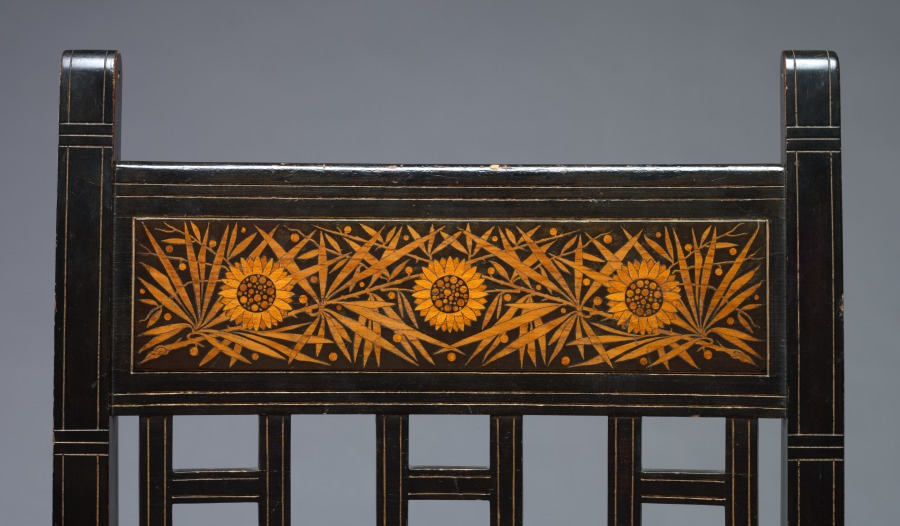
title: Chair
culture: America, New York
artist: Herter Brothers (American)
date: c. 1880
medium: ebonized cherry and other woods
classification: Furniture and woodwork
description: In the 1870s, the furniture made by the Herter firm was influenced by Japanese style, as seen in the marquetry at the top of this chair. It closely resembles one that was supplied for use in the Red Room of the White House in the redecoration of 1882–83.